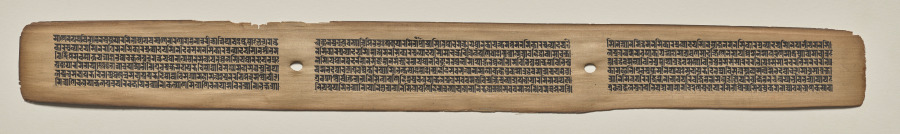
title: Text, folio 170 (recto), from a Manuscript of the Perfection of Wisdom in Eight Thousand Lines (Ashtasahasrika Prajnaparamita-sutra)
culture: Eastern India, Bihar, Vikramashila Monastery. Painting: Nepal, Kathmandu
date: Sunday, September 14, 1119 (year 239 of the Newar Samvat in the month of Ashvina)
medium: gum tempera and ink on palm leaves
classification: Painting